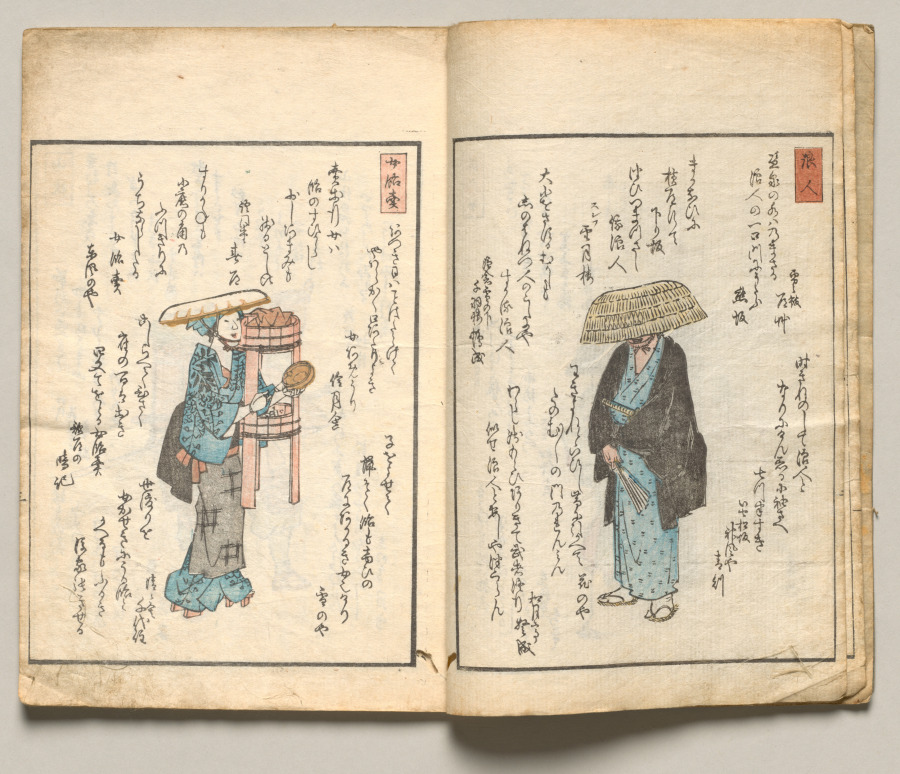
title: Spread Three from Volume Seven of People of Japan in Light Verse (Kyōka)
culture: Japan, Edo period (1615–1868)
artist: Utagawa Hiroshige (Japanese, 1797–1858)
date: 1857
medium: Woodblock-printed book; ink and color on paper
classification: Bound Volume